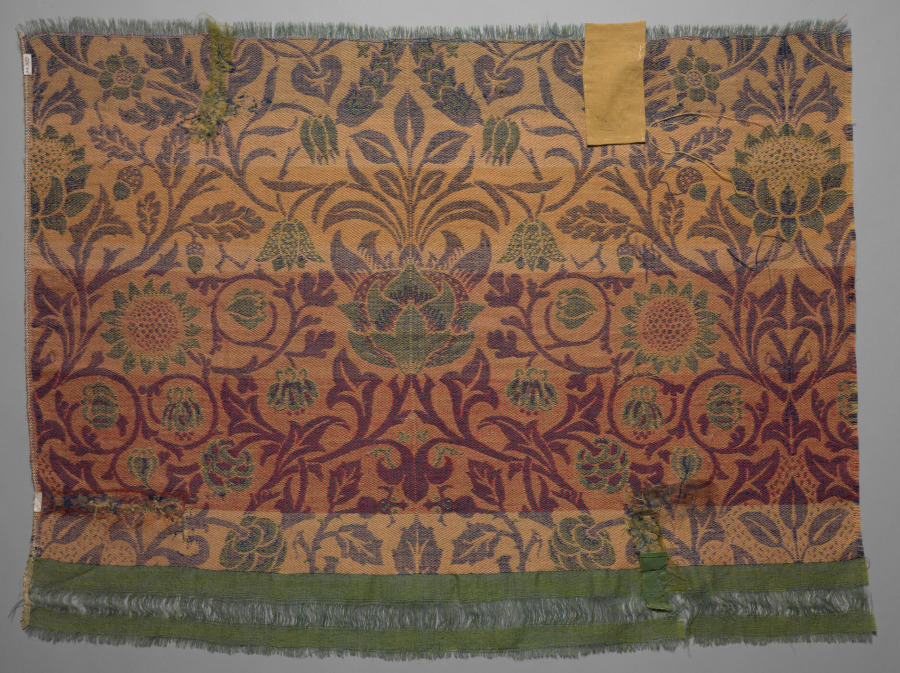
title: Violet and Columbine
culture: England, Surrey, Merton Abbey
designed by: William Morris (British, 1834–1896)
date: 1883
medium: Wool and mohair: jacquard loom woven weft-faced twill, double cloth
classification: Textile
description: Morris envisioned textiles such as Violet and Columbine hanging in heavy folds, the rich colors and flowing pattern suggesting a garden wall. He strongly preferred experimenting with natural dyes instead of using the garish chemical ones that had become standard in industrialized England. Even though organic dyes were expensive and scarce, and required dyers to revive old methods, they were less likely to fade in the light or during washing, and they were capable of producing more subtle tonal effects. A sense of the process of hand-weaving can be understood by looking at the back of this textile. The warp (up and down) threads are light blue and green—visible at the bottom. The textile was woven in long lengths that could be cut at these passages of loose thread. The weft (side to side) threads in several colors, including red, pink, yellow, and blue, are more visible from the back than the front, where they disappear into the pattern.